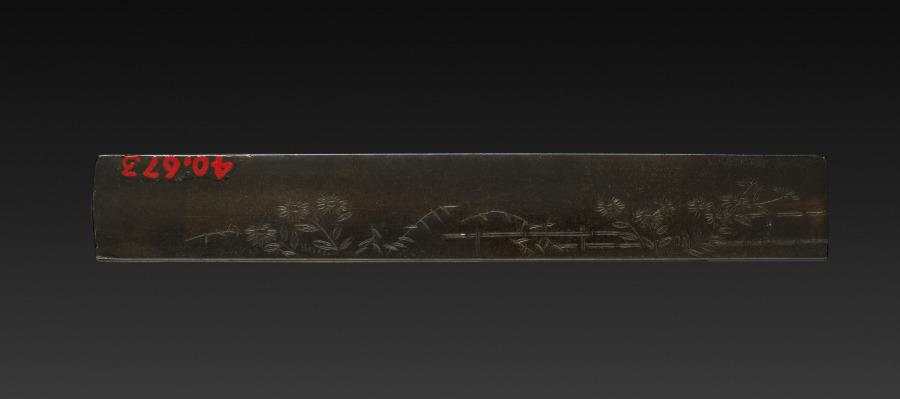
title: Knife Handle (Kozuka) with Family of Chickens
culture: Japan, possibly Edo period (1615-1868)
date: c. 1615–1868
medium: Copper-gold alloy (shakudō), gold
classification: Metalwork